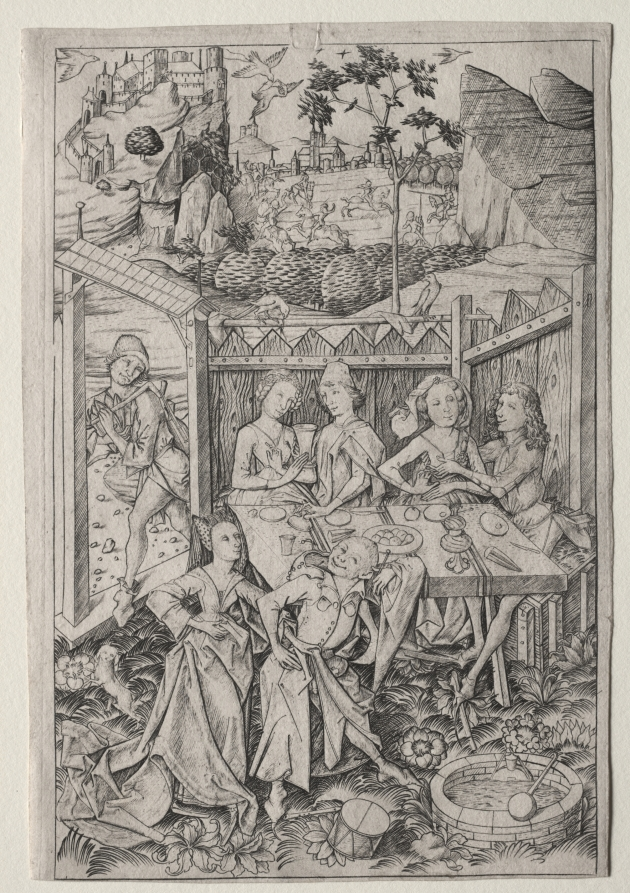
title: The Garden of Love (Large Plate)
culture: Germany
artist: Master ES (German, active 1450–67)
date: c. 1465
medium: engraving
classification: Print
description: Master ES’s action-packed scene presents a love garden before a landscape with knights playing jousting games. Love gardens were locales for displaying chaste love, but the behavior here, such as touching and wine drinking between couples at the table, indicates that their love is rather more physical. A traveling poet at the door brings musical enticements, and a man with a fool’s cap in the foreground signifies lust. The many birds throughout the scene refer to coupling, since “birding” was a euphemism for the sex act.